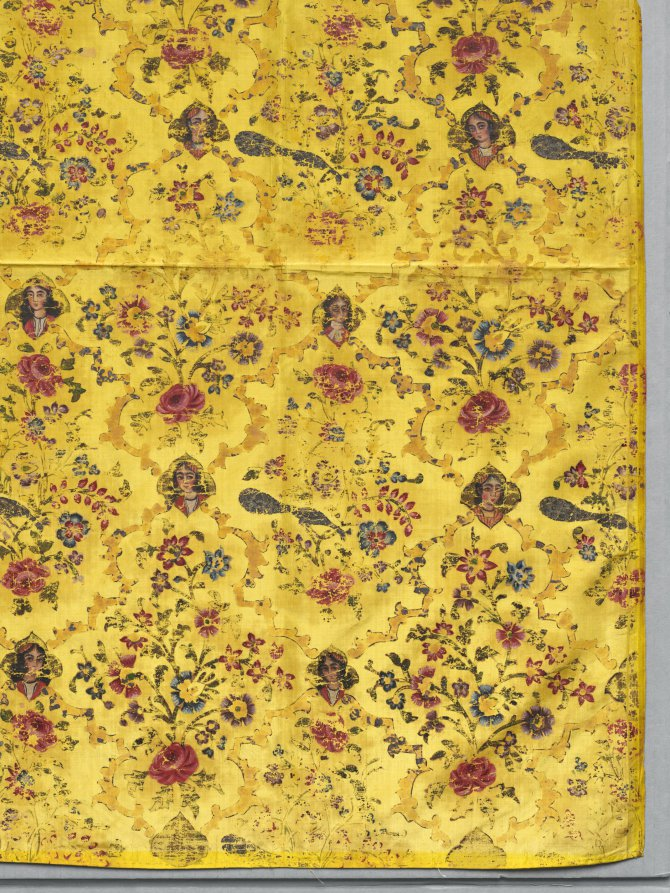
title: Wall cover with flora, peacocks, and portrait medallions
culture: Iran, Qajar period (1779-1925)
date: 1800s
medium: taffeta, hand-painted, block-printed: silk and pigments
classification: Textile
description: The European fashion of installing Chinese export silks with painted decoration as luxurious wall coverings may have inspired this exceptional Iranian silk. European engravings, which had flooded the Iranian market by the 19th century, most likely inspired the pattern. This rare silk fabric with painted figural and foliate decoration may have been a luxurious wall covering in a palace or grand mansion in the city of Kashan where mural paintings display similar 19th-century designs. Glistening silver pigment originally formed the palmette-leaf compartment outlines (now mostly deep yellow) that display colorful blossoming plants enlivened with now tarnished silver peacocks. At their junctures, portrait medallions of Iranian princesses are distinctly Qajar in attire and style, as are the composite blossoming plants.